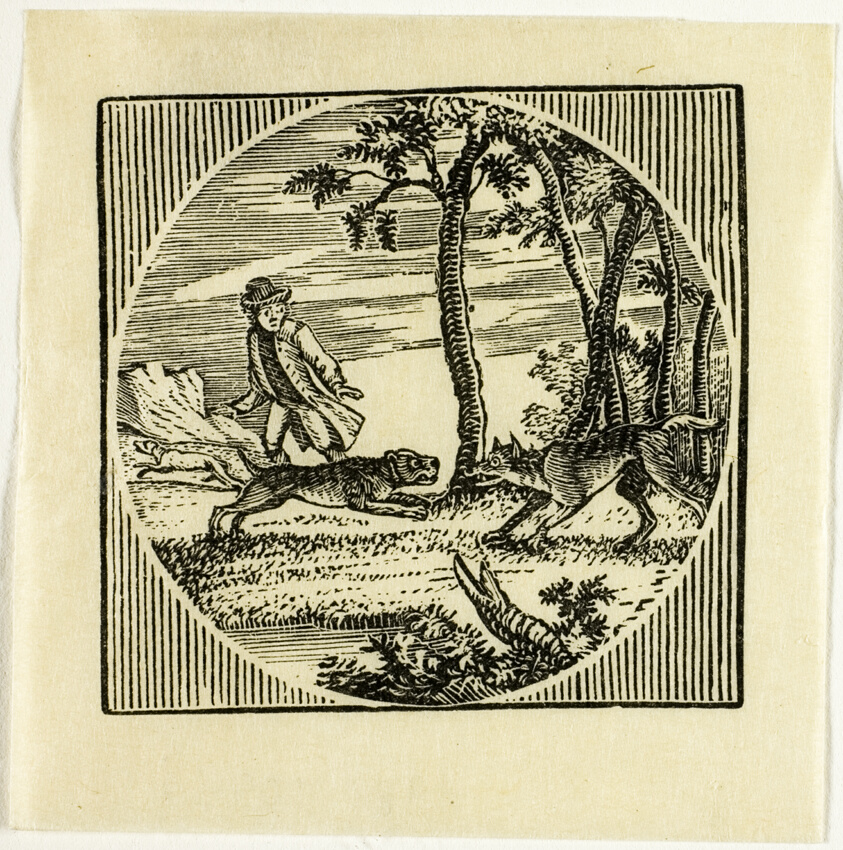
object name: Print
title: Book Illustration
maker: Thomas Bewick (English, 1753-1828)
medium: Wood engraving on paper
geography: England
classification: wood engraving; print; prints and drawing